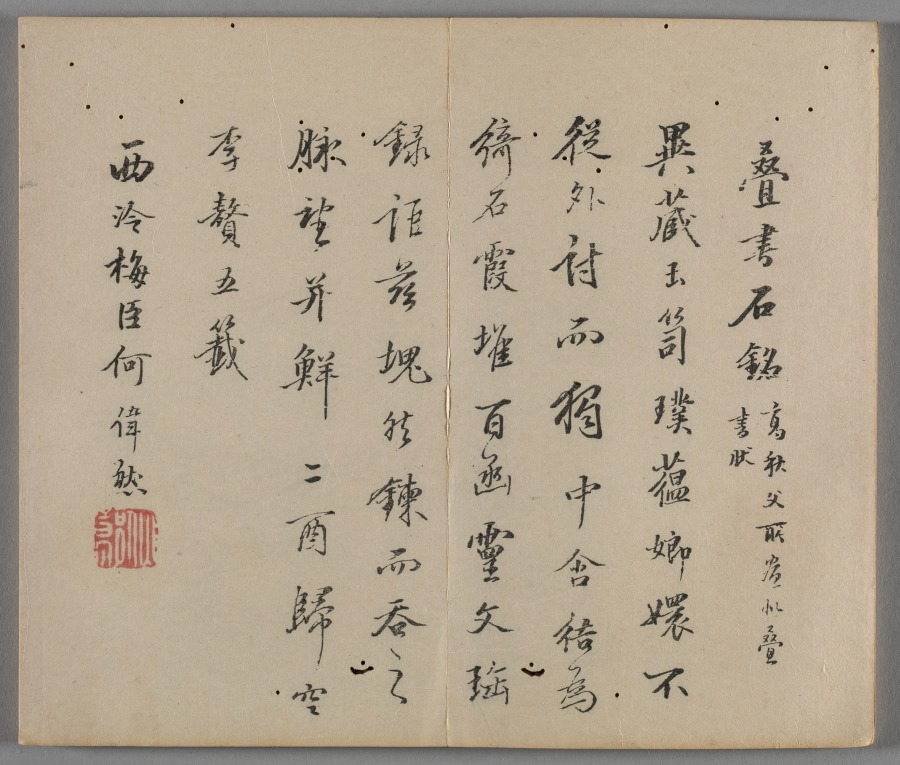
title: Ten Bamboo Studio Painting and Calligraphy Handbook (Shizhuzhai shuhua pu): Rocks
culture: China, Qing dynasty (1644-1911)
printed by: Hu Zhengyan (Chinese, c. 1584–1674)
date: 1633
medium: Woodblock-printed book; ink and colors on paper; first edition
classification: Print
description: Color printing reached a level of perfection in the early 1600s, as seen in this Ten Bamboo Studio Collection of Calligraphy and Painting and the Mustard Seed Garden Manual of Painting (printed 1679 and 1701). The painterly quality, precision in registering (aligning) the woodblocks, and harmonious colors made them the most successful color print editions in Chinese history. Both editions were printed and compiled in Nanjing, spread nationwide, and had a great impact on the arts in Japan and Korea.